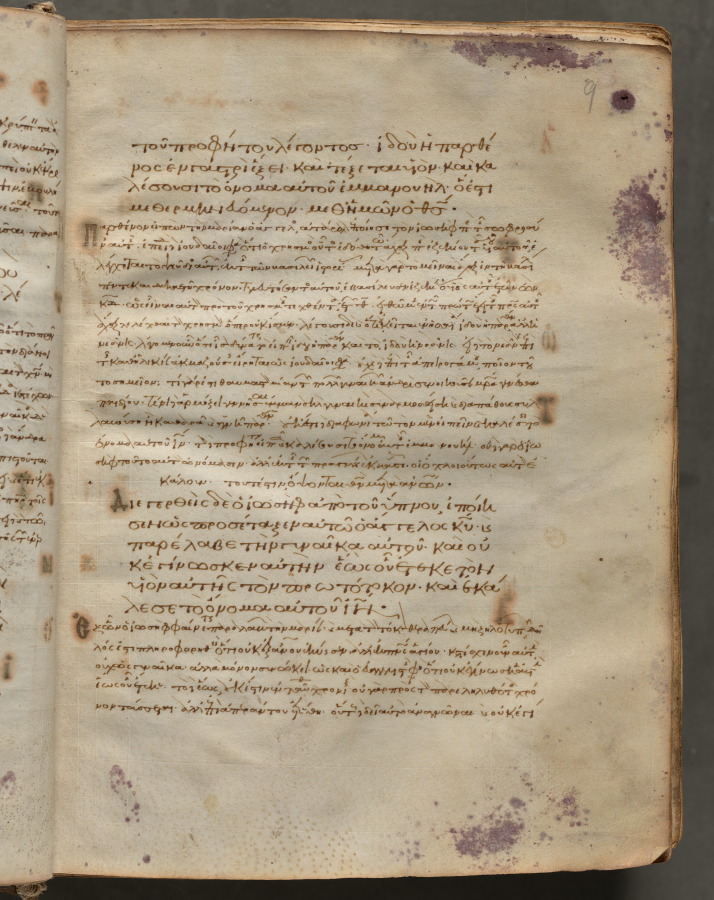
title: Text, folio 9 (recto), from a Gospel Book with Commentaries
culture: Byzantium, Constantinople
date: c. 1000–1100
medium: ink, tempera, and gold on vellum; leather binding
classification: Bound Volume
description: Each of the four gospels in this book opens on a page with brilliantly illuminated borders depicting the author of the text as well as birds-principally peacocks, symbols of the immortality of the soul-and fountains, representing the fountain of life and the salvation of the soul. This volume consists of 428 leaves with texts in Greek. Its level of sophistication suggests that it was probably written and decorated in a monastery in Constantinople.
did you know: Gospel Books were carried in procession through Byzantine churches.